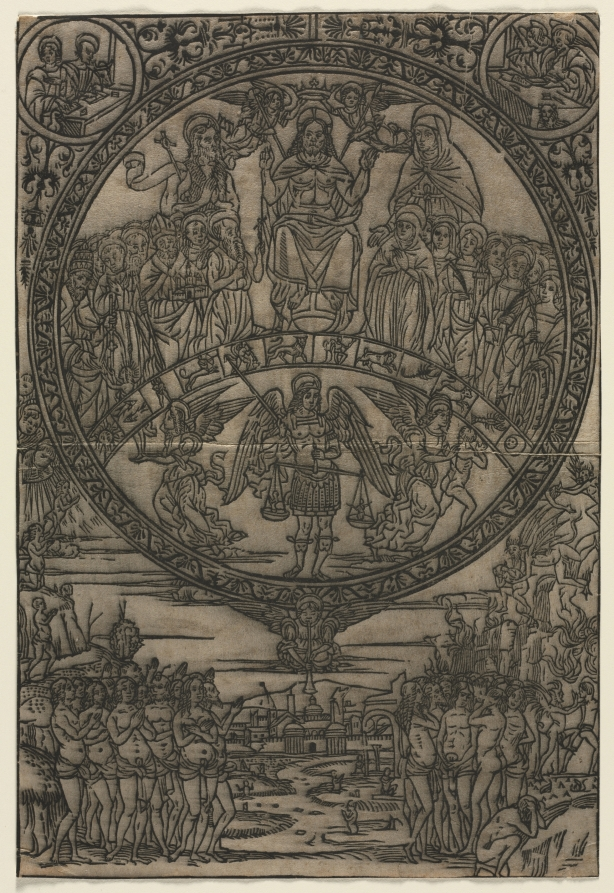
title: The Last Judgment in the Presence of the Saints and the Archangel Michael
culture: Italy, 15th century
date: 1400s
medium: woodcut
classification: Print